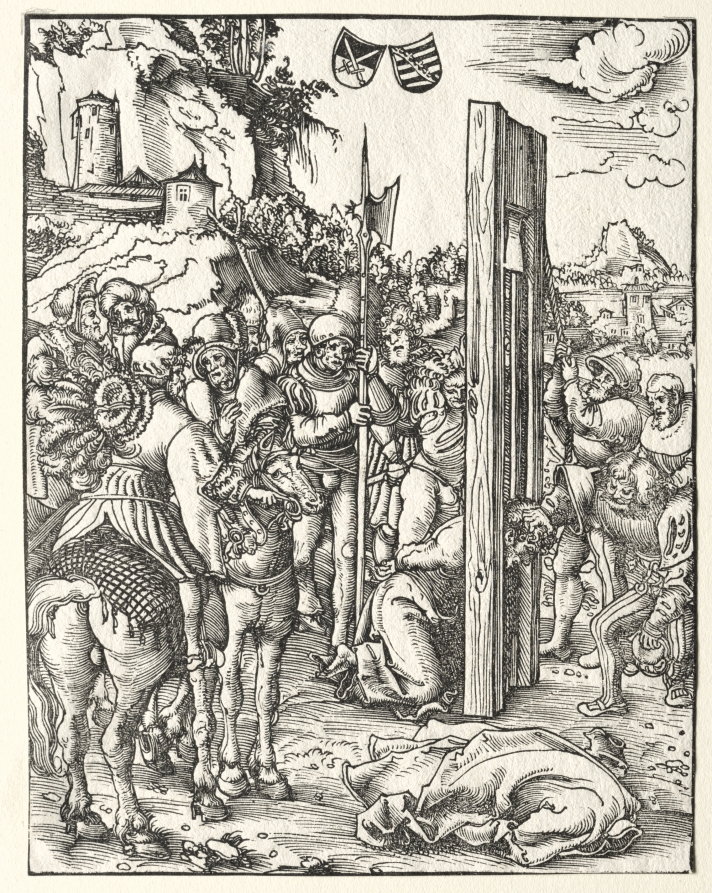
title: Martyrdom of St. Matthias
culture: Germany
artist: Lucas Cranach (German, 1472–1553)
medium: woodcut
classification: Print